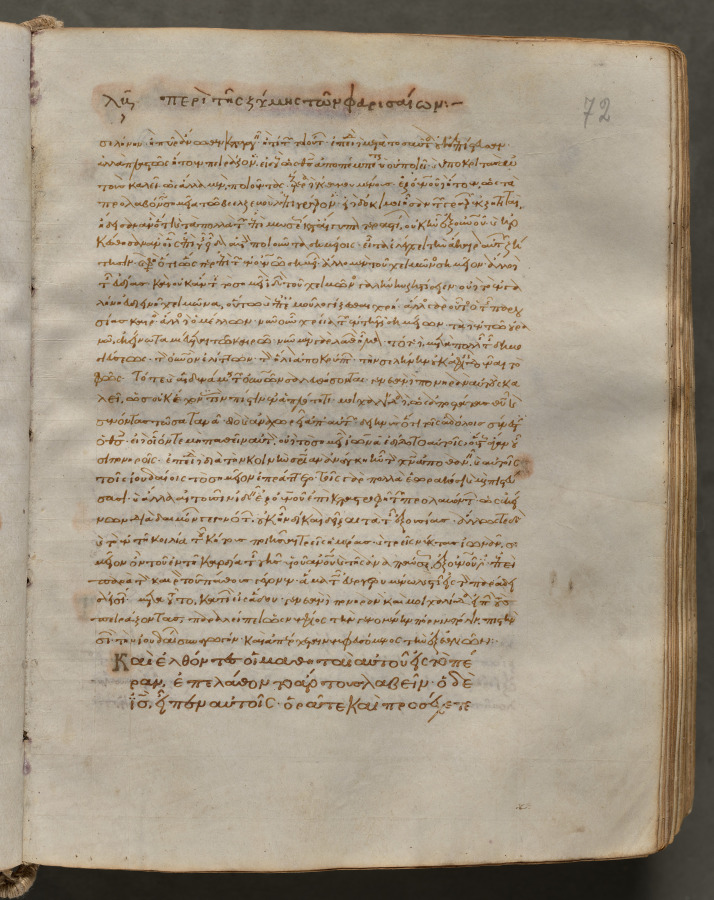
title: Text, folio 72 (recto), from a Gospel Book with Commentaries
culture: Byzantium, Constantinople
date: c. 1000–1100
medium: ink, tempera, and gold on vellum; leather binding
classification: Bound Volume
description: Each of the four gospels in this book opens on a page with brilliantly illuminated borders depicting the author of the text as well as birds-principally peacocks, symbols of the immortality of the soul-and fountains, representing the fountain of life and the salvation of the soul. This volume consists of 428 leaves with texts in Greek. Its level of sophistication suggests that it was probably written and decorated in a monastery in Constantinople.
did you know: Gospel Books were carried in procession through Byzantine churches.